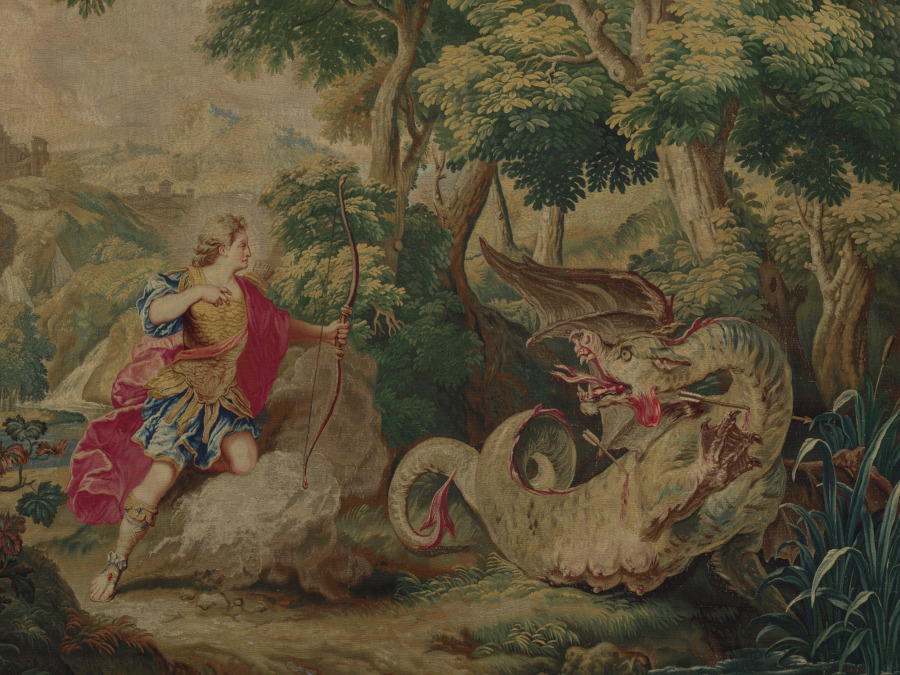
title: Apollo and the Serpent Python (from Set of Ovid's Metamorphoses)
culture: France, 18th century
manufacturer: Gobelins Manufactory (France, Paris, est. 1662)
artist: after Nicolas Bertin (French, 1668–1736)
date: 1700–1730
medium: tapestry weave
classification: Tapestry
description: Apollo’s dynamic posture with his right arm pulled back and his left holding a bow indicates that he has just shot the arrow piercing the snarling serpent’s throat and body. Apollo’s triumph over powerful Python, the fearsome serpent offspring of Mother Earth or Gaia, boosted his ego tremendously, leading to his tragically unsuccessful pursuit of Daphne. The regally dressed hunter and his prey are seen alone in an environment teeming with natural life that includes a pumpkin patch. In the creation of this textile, the manufacturer used blue and yellow dye to create the color green which has since degraded, causing the pumpkins and their leaves to appear blue.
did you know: During the French Revolution, Gobelins tapestries were sometimes disassembled to harvest the gold threads.